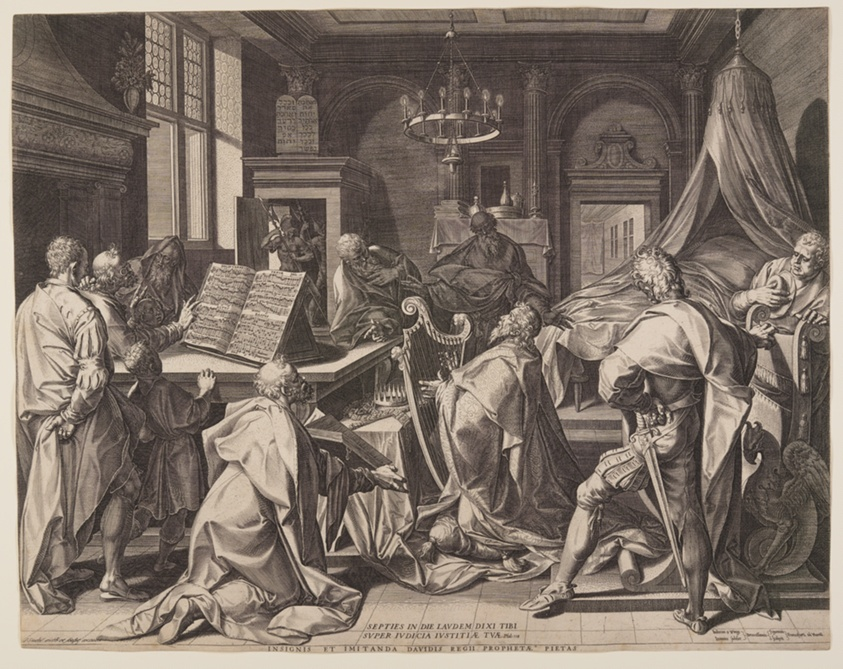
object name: Print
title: David Playing the Harp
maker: Jan Sadeler I (Flemish, 1550–1600); after Joos van Winghe (Flemish, 1544-1603)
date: c. 1585-1600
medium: Engraving on ivory laid paper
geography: Flanders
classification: engraving; paper; print; prints and drawing